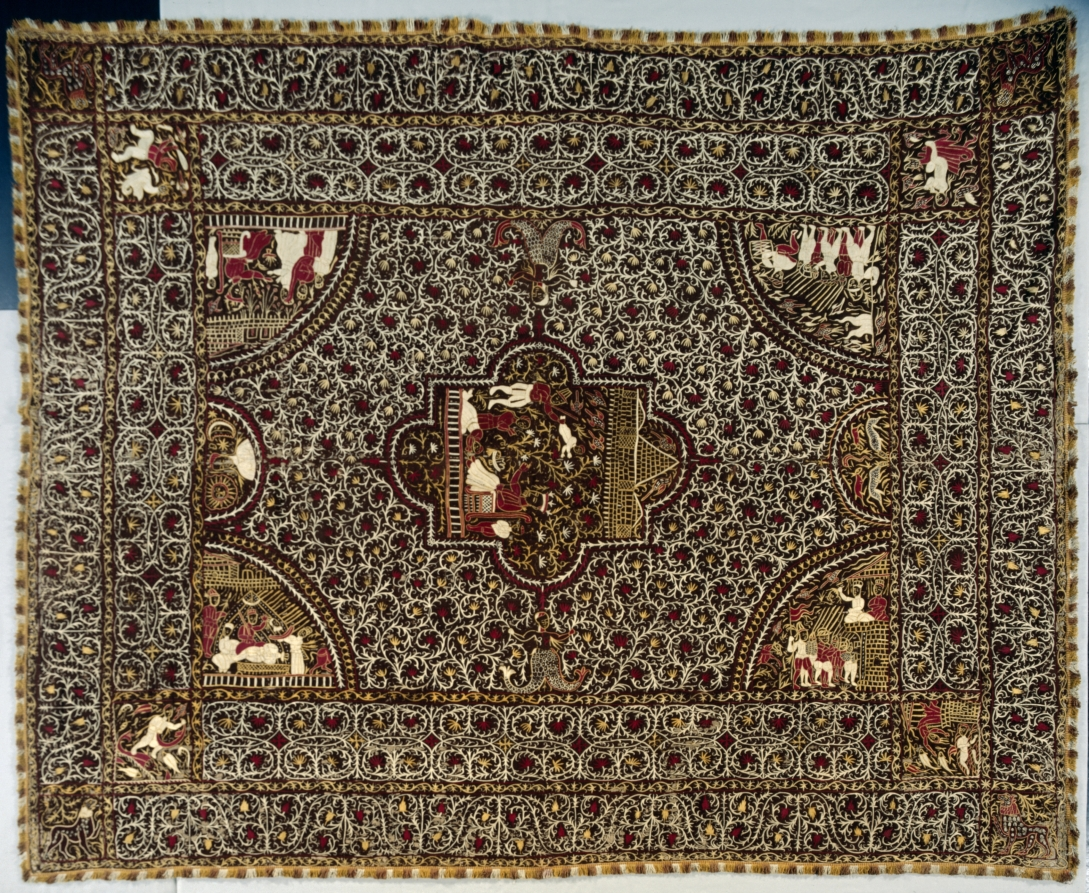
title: Bedspread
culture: India, Goa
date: 1600s–1700s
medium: Silk on cotton; embroidery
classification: Embroidery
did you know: The design features biblical scenes with Indian mythological characters and Portuguese-costumed figures embroidered in chain stitch.